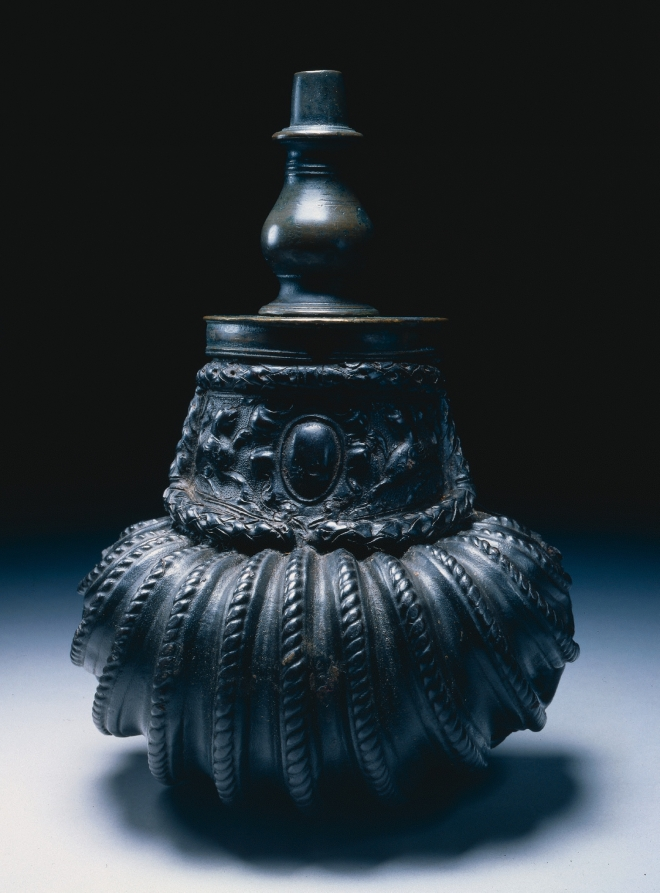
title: Powder Flask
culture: Italy, 16th century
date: c. 1560–1570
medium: leather (cuir bouilli) with embossed and fluted decoration; brass funnel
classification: Arms and Armor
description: Powder flasks are small, portable containers designed to hold gunpowder. From the 1400s to the 1800s, powder flasks were indispensable for charging and priming firearms of all types. Without powder flasks firearms were of little use to their owners. Many highly decorated flasks rank as works of art.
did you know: This flask is an exceptionally fine example of Italy Renaissance tooled leatherwork known as cuir bouilli (molded and hardened leather).